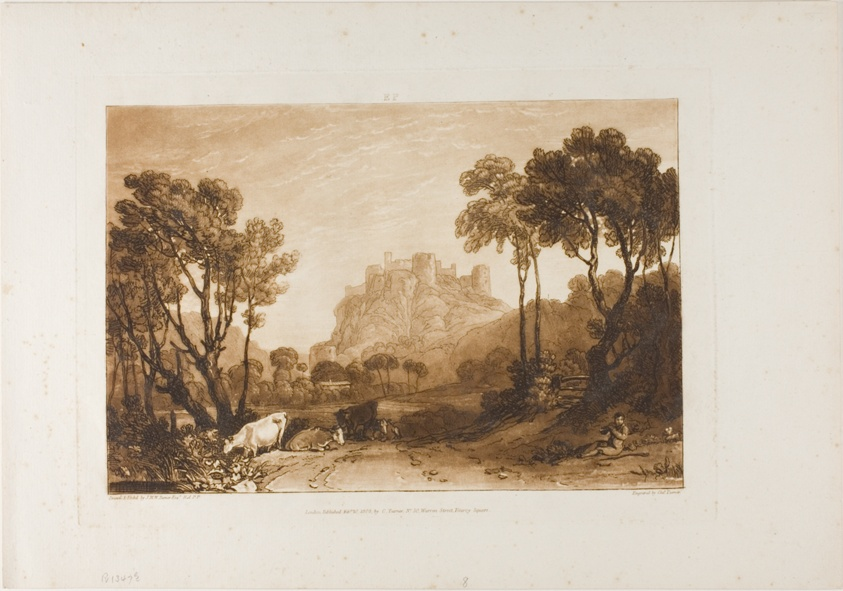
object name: Print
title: The Castle Above the Meadows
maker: Joseph Mallord William Turner (English, 1775-1851); Engraved by Charles Turner (English, 1773-1857)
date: published February 20, 1808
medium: Etching and engraving in brown on ivory laid paper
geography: England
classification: etching; print; prints and drawing